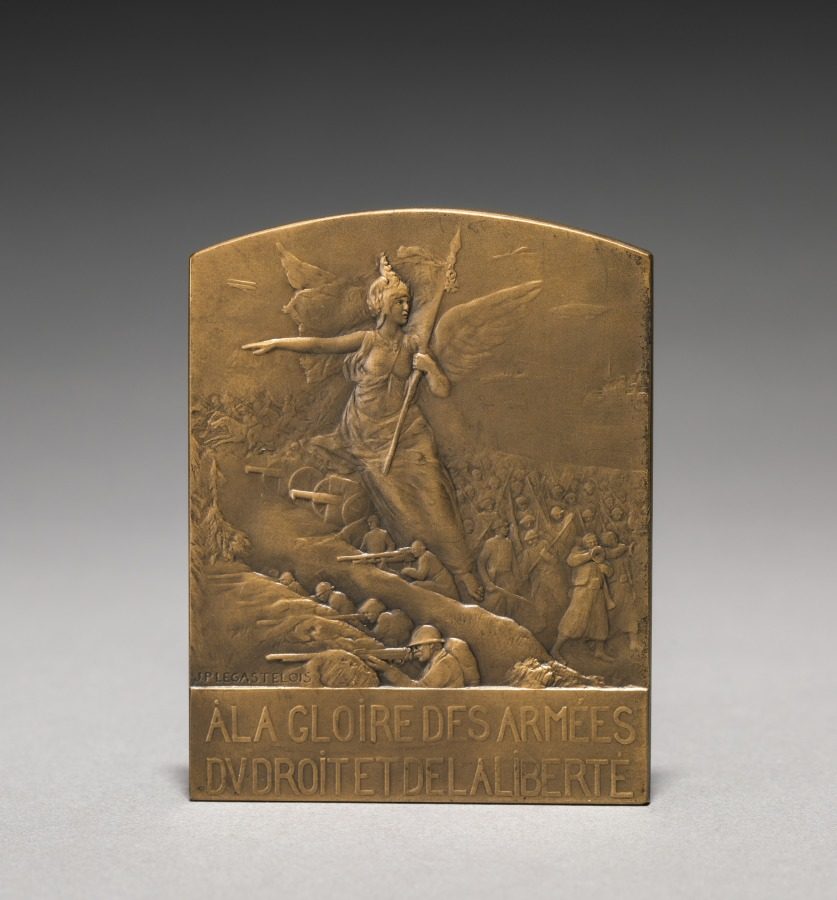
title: Medallion (obverse)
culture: France, 19th-20th century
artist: Jules Prosper Legastelois (French, 1855–1931)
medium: bronze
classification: Metalwork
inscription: "À la gloire des armées du droit et de la liberté."